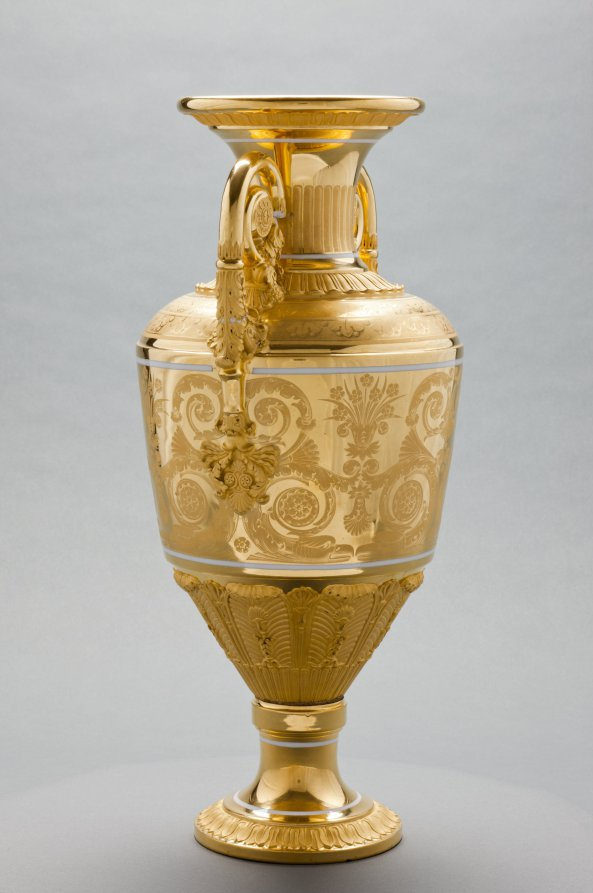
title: Vase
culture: Russia, St. Petersburg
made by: St. Petersburg Imperial Porcelain Factory (Russian)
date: c. 1820–1830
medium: gilt porcelain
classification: Ceramic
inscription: inscribed: "Moreau" in gold near lip.